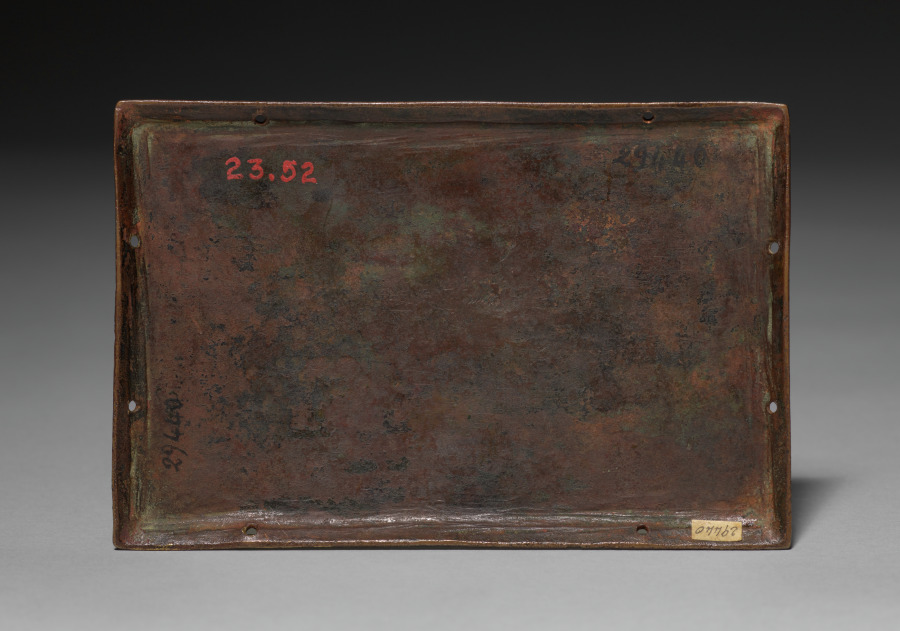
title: Enamel Plaque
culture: 19th century (Forgery)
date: 1800s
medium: champlevé enamel on copper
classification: Enamel